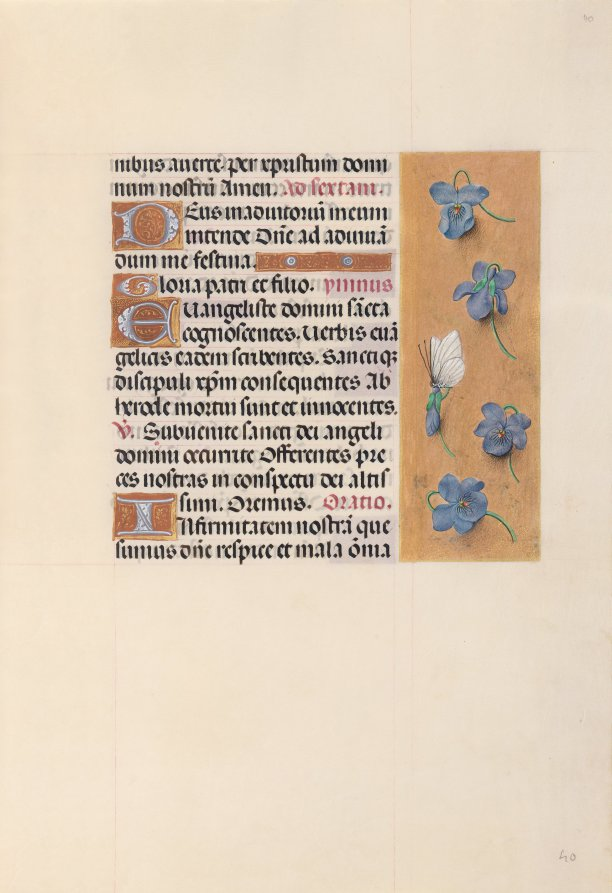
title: Hours of Queen Isabella the Catholic, Queen of Spain: Fol. 40r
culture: Flanders, Ghent and Bruges, late 15th century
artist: Master of the First Prayerbook of Maximillian (Flemish, c. 1444–1519)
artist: and Associates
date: c. 1500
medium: ink, tempera, and gold on vellum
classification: Bound Volume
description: This manuscript was illuminated by a circle of at least five highly organized manuscript painters active in the Flemish cities of Ghent and Bruges. The principal illuminator was Alexander Bening, who painted the majority of the book's miniatures. Manuscripts produced by this circle of artists are renowned for the decoration of their borders, which typically feature a rich variety of realistically-painted flowers, birds, and butterflies. This prayer book, called a book of hours, was intended not for a cleric, but for the private devotions of a lay person-in this case, Isabella the Catholic, Queen of Spain (1451-1504). Isabella's coat of arms embellishes the book's frontispiece. It is unlikely that the book was commissioned by the Queen herself; rather, she probably received it as a diplomatic gift from someone courting her patronage, perhaps Cardinal Francisco Jimenez de Cisneros. A Franciscan friar, Jimenez was dependent upon Isabella for his advancement, first to the post of Queen's confessor in 1492, and then to Archbishop of Toledo in 1495.